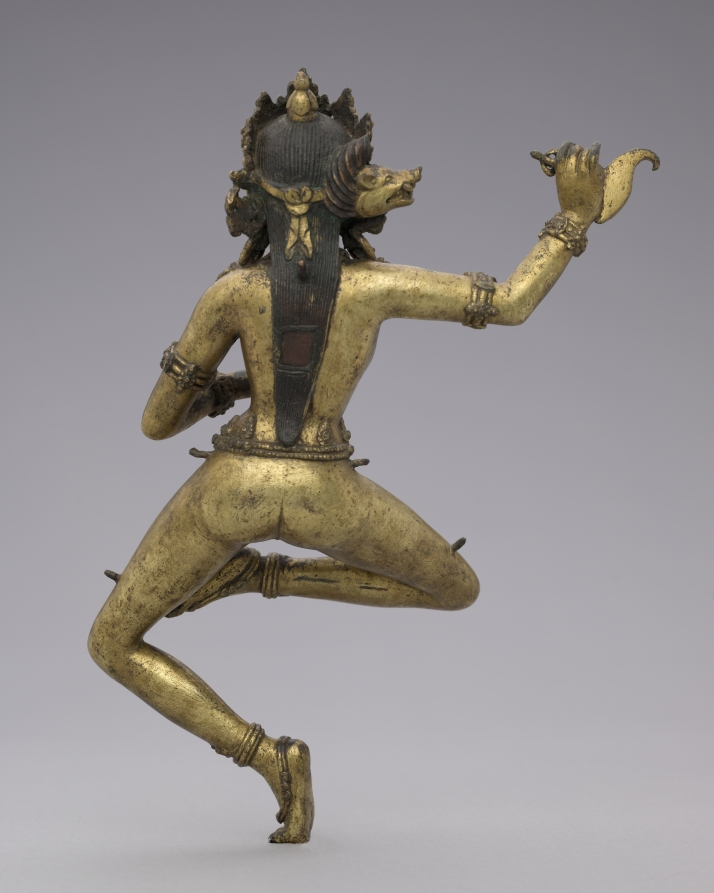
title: Vajravarahi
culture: Tibet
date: 1300s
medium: gilt bronze with turquoise inlay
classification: Sculpture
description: Vajravarahi is the tantric Buddhist counterpart to the Hindu mother goddess Varahi, identifiable by the boar head emerging above her right ear. She is a female enlightened being who emanated from the Buddhist Goddess of Perfect Wisdom. Enlightened beings transcend gender distinctions, and they can emanate as either male or female. The lithe figure dances while carrying a skull cup in her left hand. Raised up in her right hand is a ritual flaying knife with a handle in the shape of a halfvajra, used for skinning the metaphorical beast of uncontrolled passions. The pegs cast into her lower body were for holding a bone skirt.